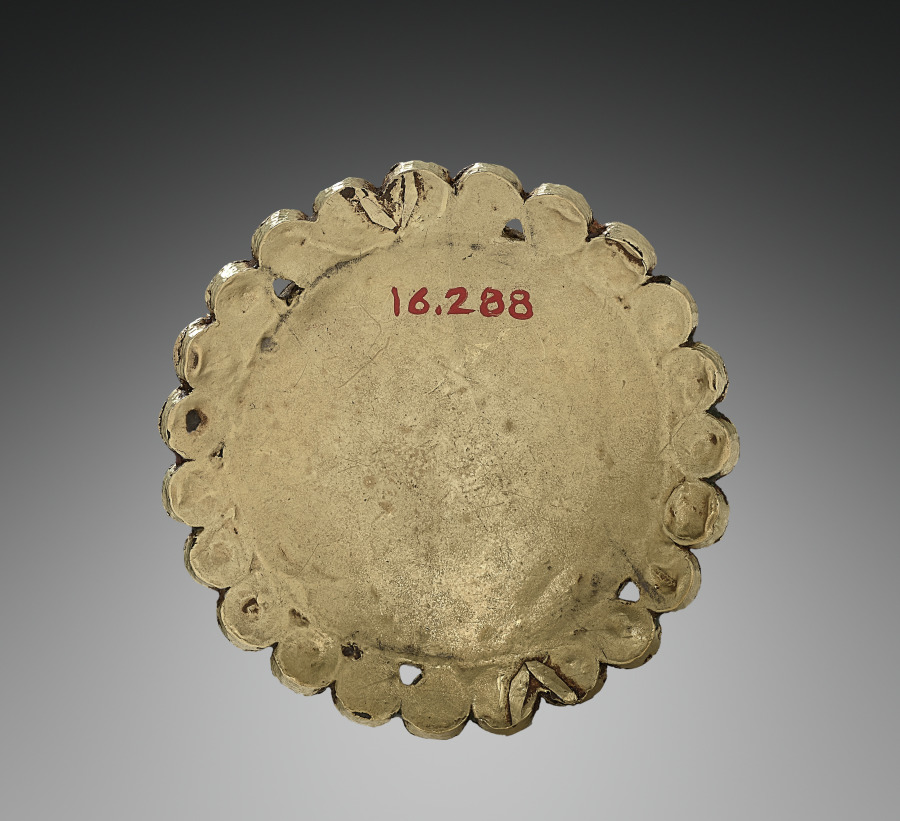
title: Ornament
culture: India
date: 1800s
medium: Gold with green enamel ground, white sapphires, rubies, and pearls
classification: Jewelry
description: Circular ornaments were worn as pendants, sewn onto textiles, or pinned into hair. The decorative motif made of colorful gems depicting flowering plants was introduced during the reign of the Mughal emperor Shah Jahan (1628–58) and remained popular through the 1800s.